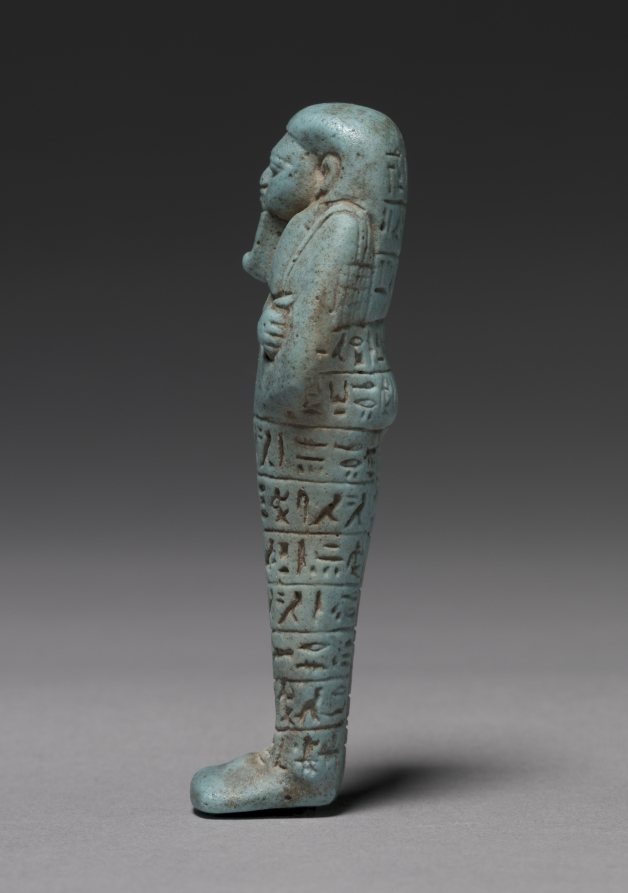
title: Shawabty of Ankh-Hor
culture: Egypt, Thebes, Late Period, Dynasty 26, reign of Psammetichus II-Apries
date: 595–586 BCE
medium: pale turquoise, vitreous Egyptian blue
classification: Funerary Equipment